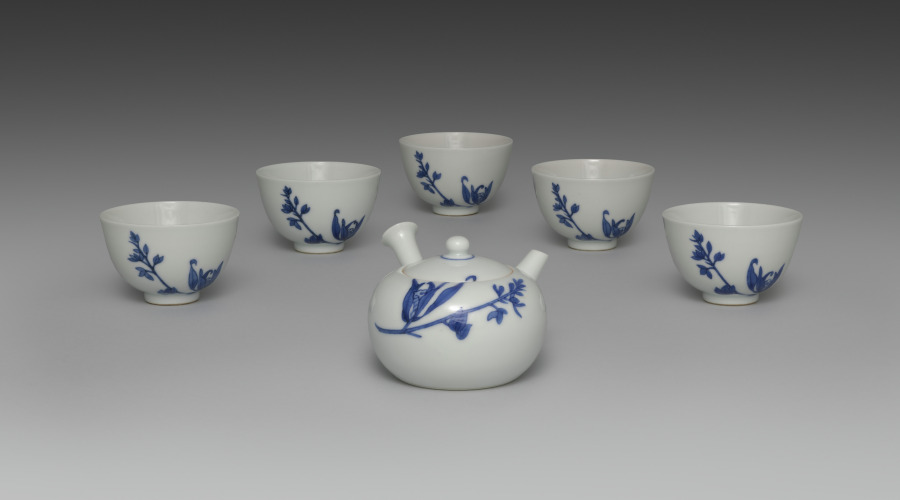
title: Tea Set with Orchids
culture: Japan, Meiji period (1868–1912)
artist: Seifū Yohei III (Japanese, 1851–1914)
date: c. 1893–1914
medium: Teapot with set of five teacups; porcelain with underglaze blue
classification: Ceramic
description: Although the teapot here is stored in a separate box from the five cups, these six pieces may once have been part of a tea set that included other tools such as a water cooler. The teacups have orchid flowers on both sides in underglaze blue, as well as a blue band inside the footring. The teapot has the same design and a blue band painted around the bottom of the lid’s knob. The cups’ long wood storage box is stamped on the exterior, over the lid and base, with a small red seal reading “Satō.” The same seal appears on five small squares of yellow textile, one placed in the bottom of each compartment in the teacup storage box. These are additional to the customary yellow cloths stamped with a “Seifu” seal. Interestingly, four of the Seifū cloths are stamped with an ovoid seal, while the remaining cloth, which is a slightly lighter color, has an unusual seal that is not quite gourd-shaped and with the fū of Seifū in a stylized, unrecognizable form. The teapot has its own box with a Satō seal and is wrapped with an orange textile stamped with the same unusual Seifū seal. A set with a very similar surface design is in the Brooklyn Museum. The Brooklyn set has a water cooler and a small pitcher, in addition to the teapot and cups, and all are in a single storage box. This box records the tea tools as made with kanpakuji, or “bright-jewel white porcelain,” counted among Yohei III’s most important inventions, and carved images. In fact, both sets have a white surface much closer in coloration to the cool white of porcelain clay used in Kyoto at the time, and the designs are simply painted. The Brooklyn set was thus likely mismatched at some point with a box intended for another tea set. Nonetheless, the box may have helped prevent the set’s original components from being dispersed, and the set itself provides insight into how the other tools from the present set may have looked.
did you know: This tea set with orchids has a side-handled pot called a kyūsu, used for steeping, straining, and serving tea.